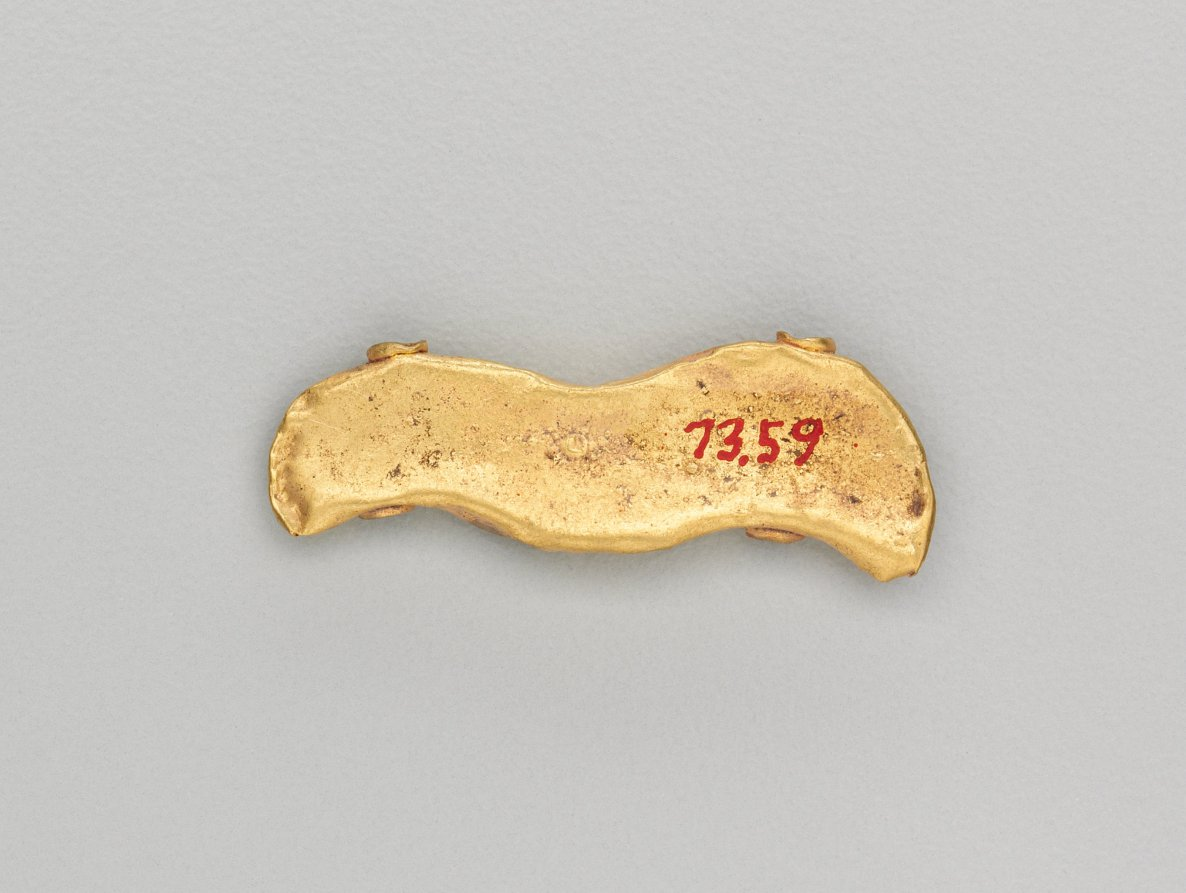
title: Set of Pendants Ending in a Bull's Head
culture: India, Shunga period (185–78 BCE)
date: 185–72 BCE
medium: gold repoussé with granulation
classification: Jewelry